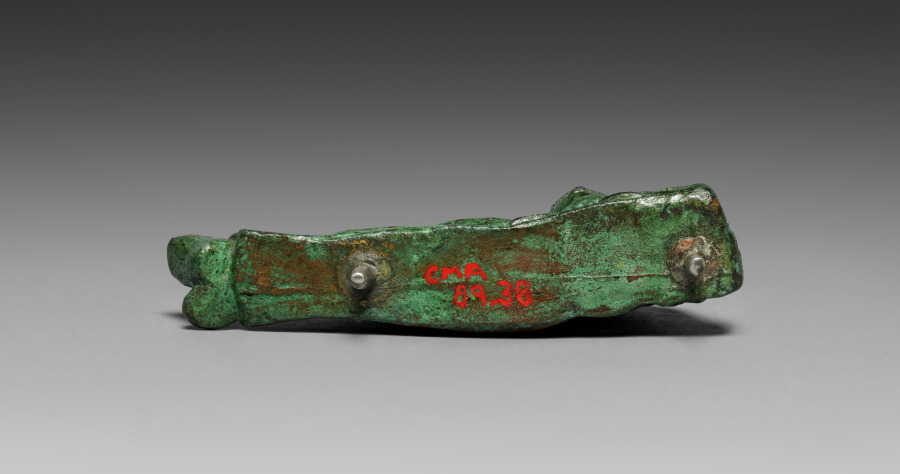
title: Vessel Ornament of Banqueter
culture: Etruscan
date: c. 400–375 BCE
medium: bronze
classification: Sculpture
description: This bronze banqueter figurine was one of six once adorning the rim of a large basin, now lost. Cast in molds with individualized details, most have grooves on their underside to attach to the basin. Minute traces of gilding remain on areas of clothing and skin (mostly visible only under magnification), suggesting that they may have been completely gilded. Two handles in the form of hippocampi, horses with serpentine tails, also belonged to the basin and are now displayed at the Michael C. Carlos Museum at Emory University. The basin may have been used to hold liquid for a banquet, or was perhaps funerary. This bronze figurine lies on his side in the posture of an ancient banqueter. His right arm is broken off but may once have rested on his hip. The figurine wears a garland on his head and a himation draped loosely around his left shoulder, revealing a muscular chest. One leg is raised over the other and a foot is exposed. Specks of gilding remain on the chest and head, but is different in color than that on the other five figurines. Also unlike the others, this one bears a visible seam across its entire length and has no groove underneath.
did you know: This reclining male banqueter demonstrates the posture of symposium guests.